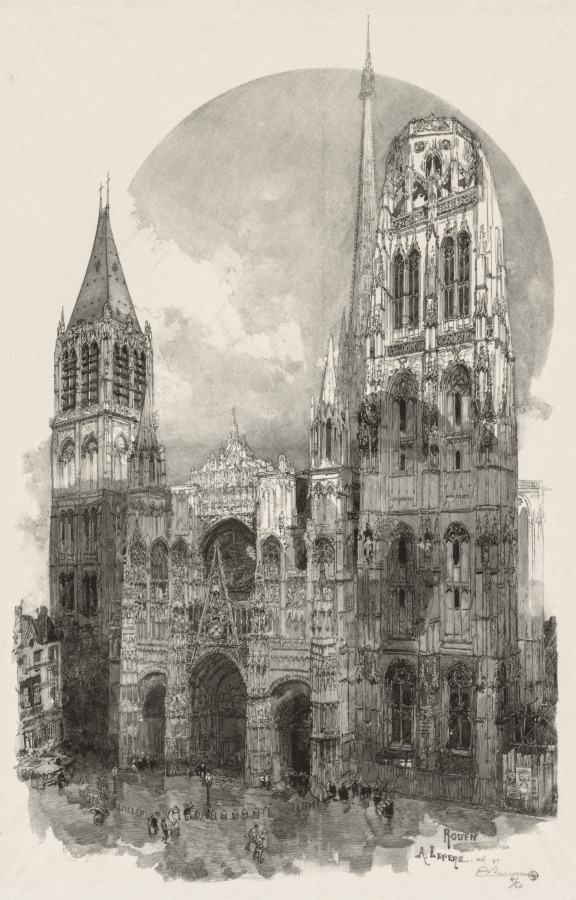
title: La Cathedrale de Rouen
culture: France, 19th century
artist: Auguste Louis Lepère (French, 1849–1918)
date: 1888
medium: wood engraving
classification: Print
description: Lepère developed an extraordinary mastery of wood engraving with which he achieved rich tonal contrasts. Felix Bracquemond, an important 19th-century etcher, called Lepère the artist who "sees as a painter and renders as a printmaker."